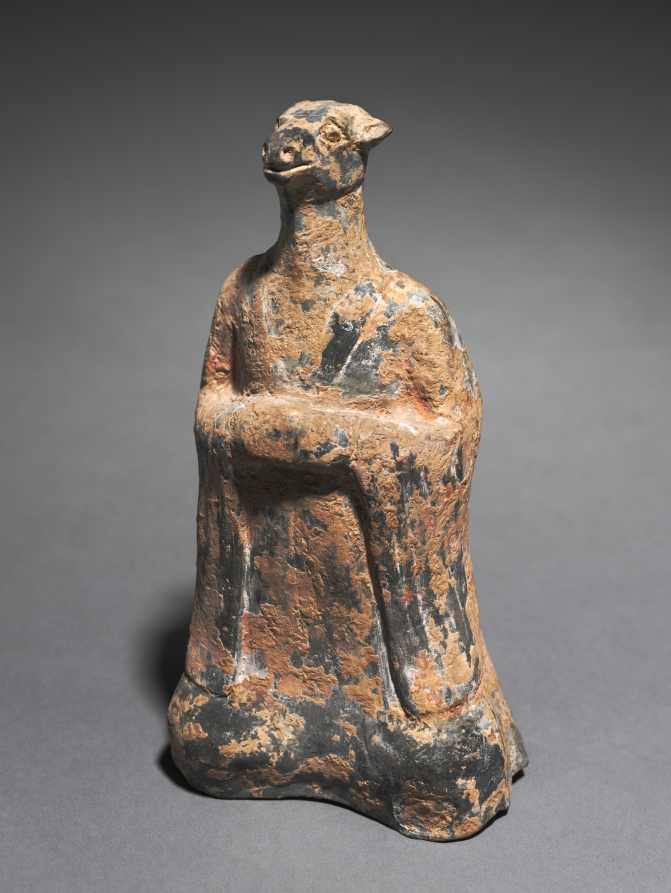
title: Mortuary Figure of the Zodiac Sign: Ox (Taurus)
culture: China, Northern Wei dynasty (386-534)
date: 500s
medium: gray earthenware with traces of slip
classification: Sculpture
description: The twelve-animal zodiac series—rat, ox, tiger, rabbit, dragon, snake, horse, goat, monkey, rooster, dog, and boar—signifies a traditional Chinese concept of time structured in a cyclical order. The twelve animals are also linked to the art of fortune-telling that underlies human existence in connection with the changes of the universe. The use of the twelve zodiac animals as tomb furniture suggests they provided a cosmological structure for the afterlife.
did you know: The lower half of the interior of the figure is hollow.